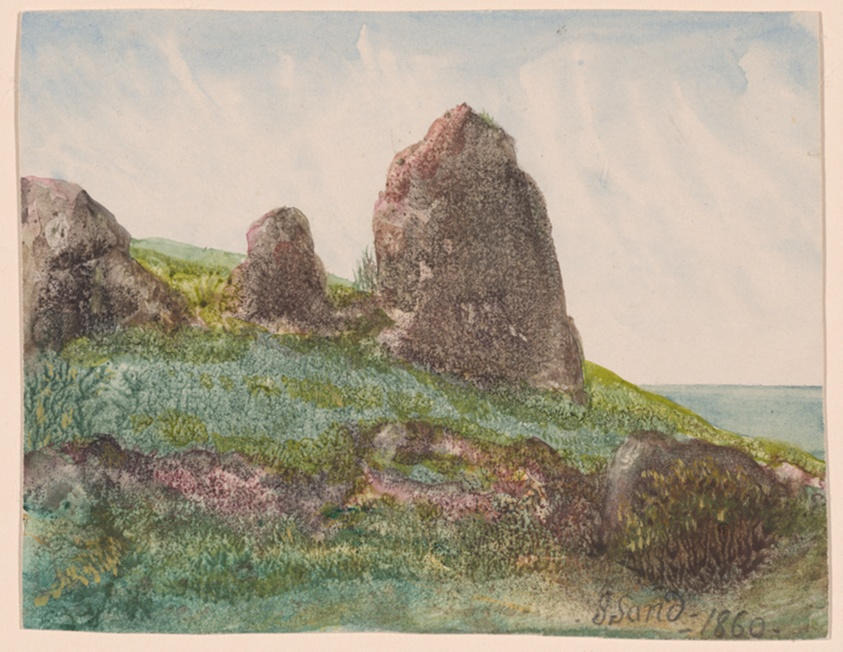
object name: Drawing and Watercolor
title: Landscape with Rocks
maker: George Sand (French, 1804-1876)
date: c. 1868/76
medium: Transparent and opaque watercolor on cream wove paper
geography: France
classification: prints and drawing; drawing; gouache; paper; watercolor